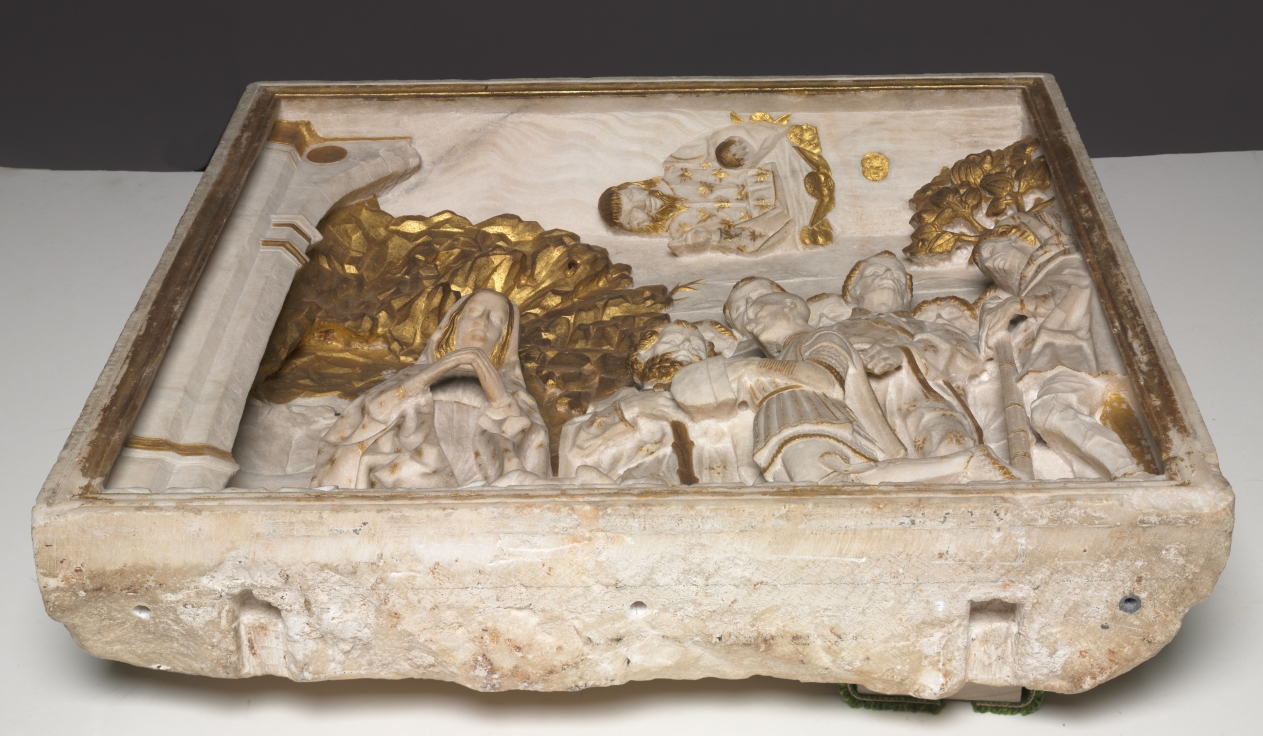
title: Pier Francesco Visconti, Court of Saliceto, Adoring the Christ Child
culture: Italy, Milan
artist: workshop of Benedetto Briosco (Italian, c. 1460–after 1514)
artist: and Tomaso Cazzaniga (Italian)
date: shortly after 1484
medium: marble with gilding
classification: Sculpture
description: This relief formed part of a public funerary monument in the church of Santa Maria del Carmine in Milan. The military leader and diplomat humbly kneels in profile before the infant Christ in a naturalistic setting, drawing attention to the Holy Family’s humanity and the deceased man’s reverence.